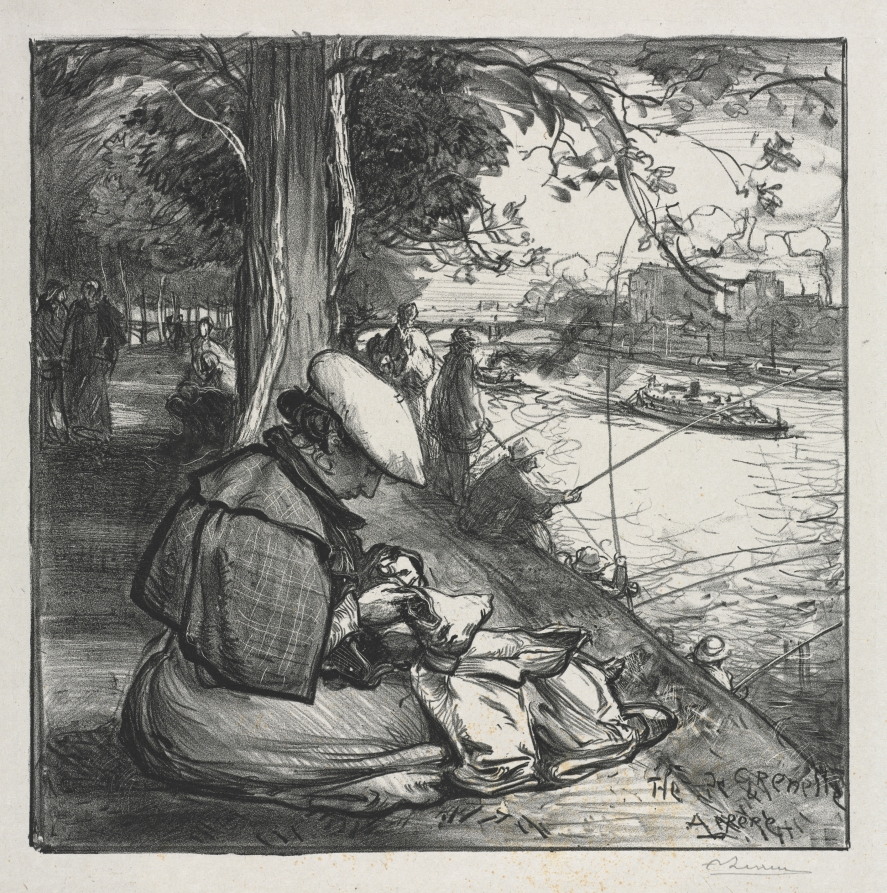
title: L'île de Grenelle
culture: France, 19th century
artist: Auguste Louis Lepère (French, 1849–1918)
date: 1898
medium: lithograph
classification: Print